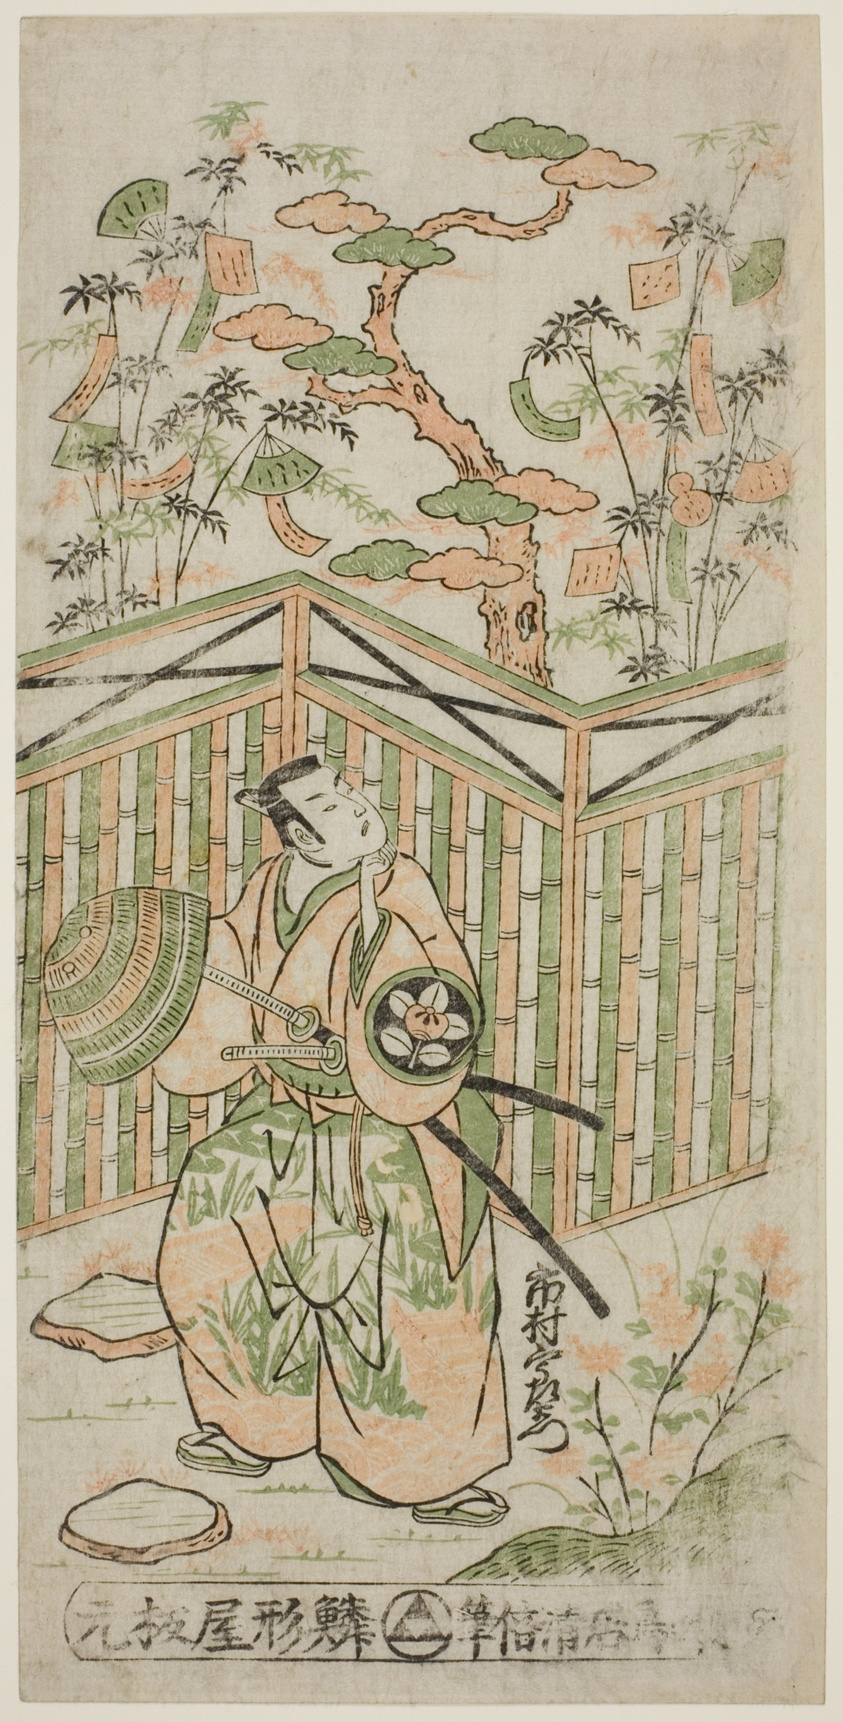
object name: Print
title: The Actor Ichimura Uzaemon VIII as Oguri Hangan in the play "Mangetsu Oguri Yakata," performed at the Ichimura Theater in the eighth month, 1747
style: Japanese (culture or style)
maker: Torii Kiyomasu II (Japanese, 1706 (?)–1763 (?))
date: 1747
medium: Color woodblock print; hosoban, benizuri-e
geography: Japan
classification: woodblock print; print; asian art